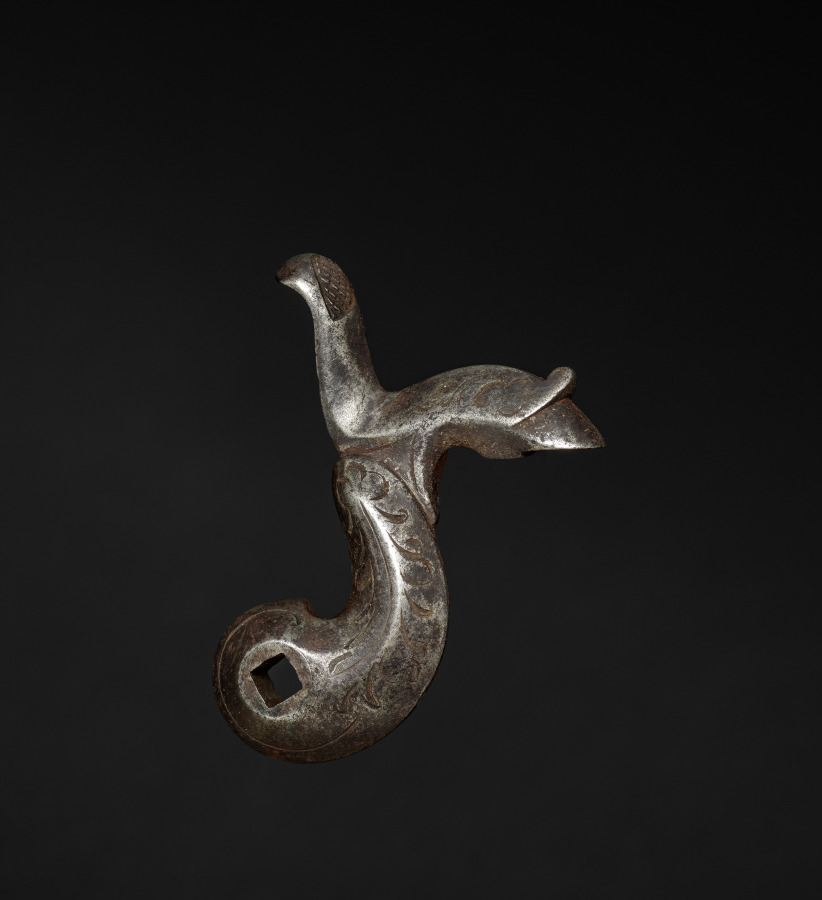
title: Gun-Lock Hammer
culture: England, early 19th century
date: early 1800s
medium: steel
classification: Arms and Armor